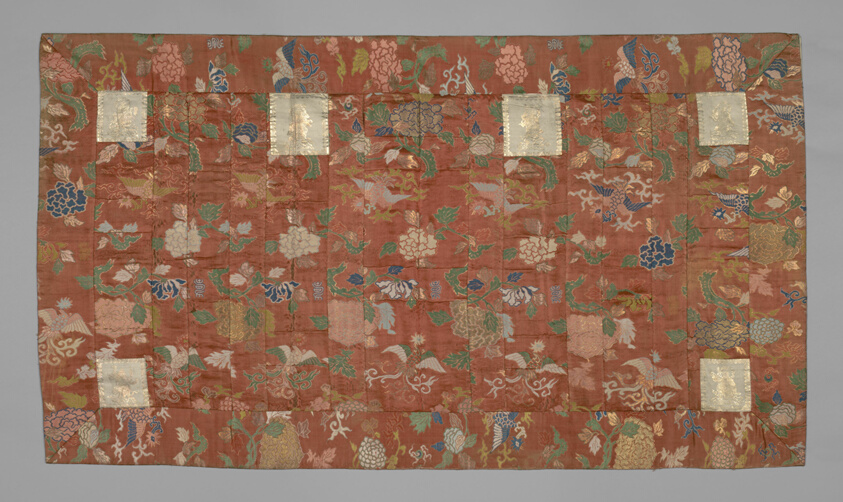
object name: Textile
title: Kesa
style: meiji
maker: Japan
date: Meiji period (1868–1912), late 19th century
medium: Silk and gold-leaf-over-lacquered-paper strips, warp-float faced 5:1 'Z' twill weave with supplementary patterning wefts bound in twill interlacings; patches: silk and gold-leaf-over-lacquered-paper strips, warp-float faced 3:1 'Z' twill weave with plain interlacings of secondary binding warps and supplementary patterning wefts; lined with cotton, plain weave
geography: Japan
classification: textile; liturgical - buddhist; weaving; costume